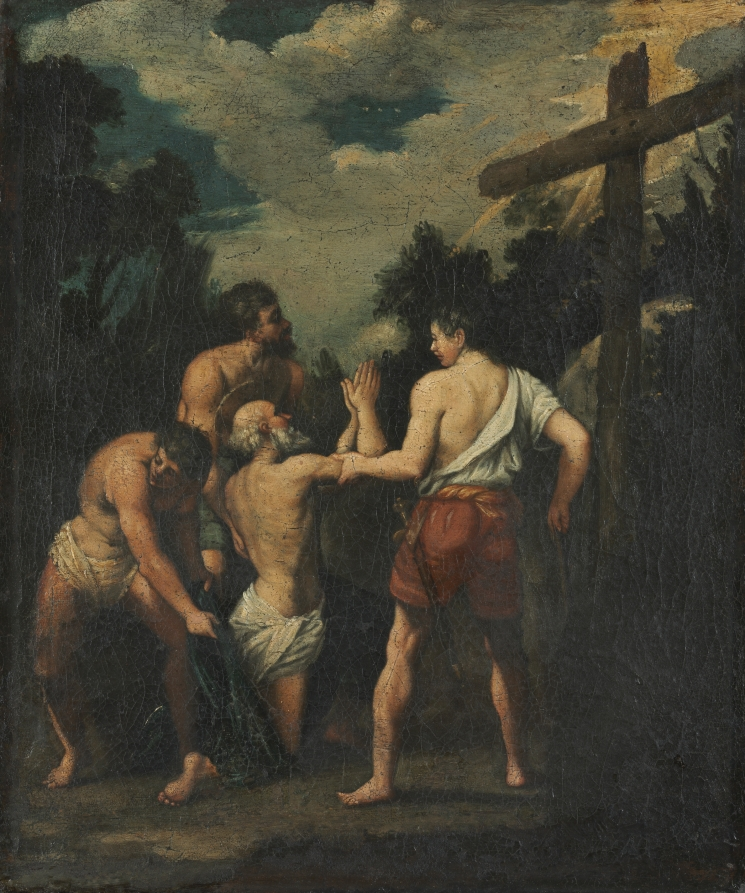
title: Martyrdom of Saint Andrew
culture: Italy, 17th century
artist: copy after Guido Reni (Italian, 1575–1642)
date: 1600s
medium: oil on canvas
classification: Painting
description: This small devotional picture by an anonymous 17th-century Venetian artist drew his composition from Guido Reni's large St. Andrew Led to Martyrdom fresco in Rome's Church of San Gregorio al Celio. The CMA painting portrays the central image of Reni's 1608 fresco by Reni. St. Andrew and his brother Peter were apostles of Christ and left all of their possessions to follow him. Andrew was martyred in Achaea. He requested to be crucified on the X-shaped cross because Andrew considered himself unworthy of dying on the same cross as Christ. Reni depicted an X-shaped cross in the fresco, while in this painting, the Latin cross is used. The Latin cross was common to Northern art, suggesting that the artist of this painting may have been Venetian. This representation of St. Andrew's martyrdom focuses on St. Andrew's adoration of the cross. The CMA version does not possess the chaos of Reni's larger scene, focusing instead on the central four figures, whereas in the original, a crowd of people surrounds the central group. The figure on the left bends in an unnatural pose and lacks the precision of Reni's original forms, suggesting that this piece is by another artist. The cross, originally seen in the distance, appears in the foreground of the smaller work, brought closer to St. Andrew to emphasize his relationship with God and his acceptance of his coming death.